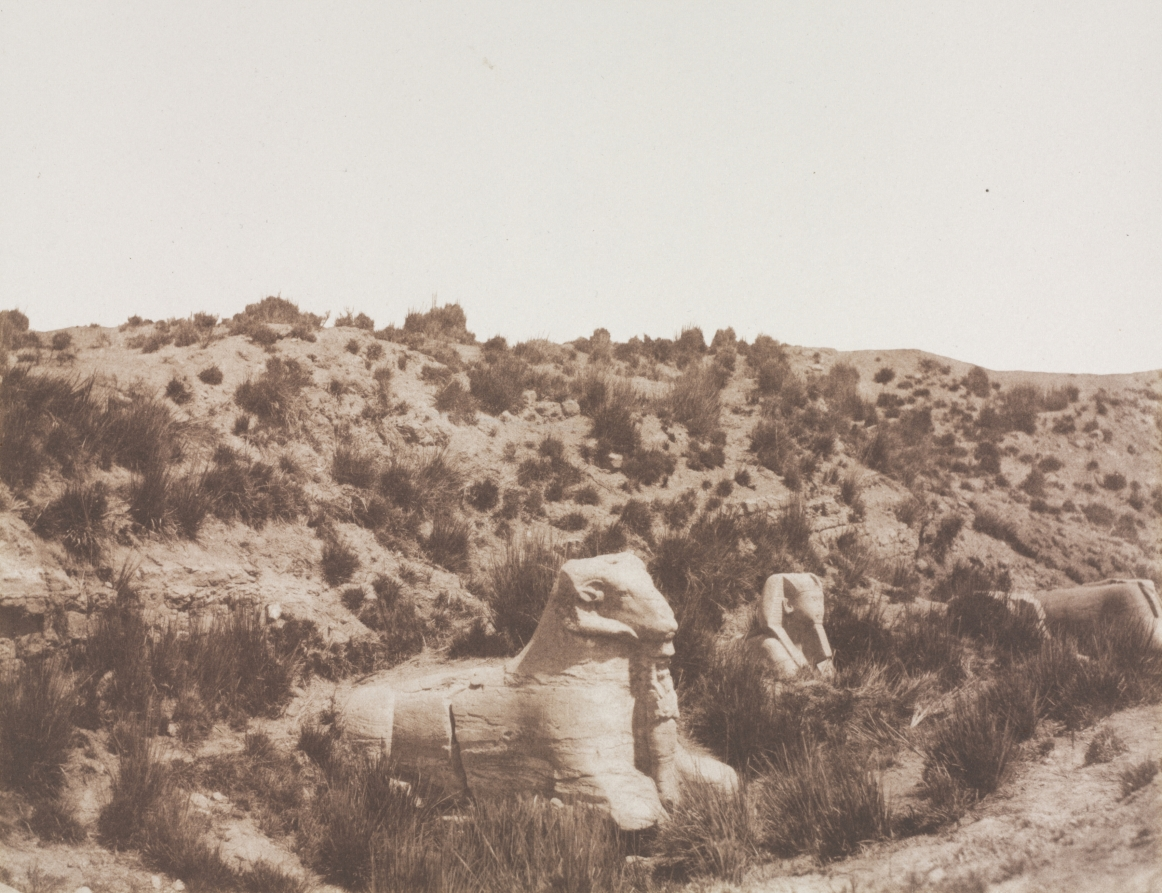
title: Sphinxes with a Human Head and with a Ram Head at Point Y. Karnak (Thebes)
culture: France, 19th century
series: Égypte et Nubie, sites et monuments les plus intéressants pour l'étude de l'art et de l'histoire, pl. 68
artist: Félix Teynard (French, 1817–1892)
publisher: Goupil et Cie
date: 1851–52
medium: salted paper print from calotype negative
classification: Photograph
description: The monumental sphinx at Giza, which has the head of a man and the body of a lion, is one of the most iconic symbols of ancient Egypt. The country contains other, humbler versions of this mythical creature. The one here with the head of a ram is only nine feet long and held a statue of a human between its paws.